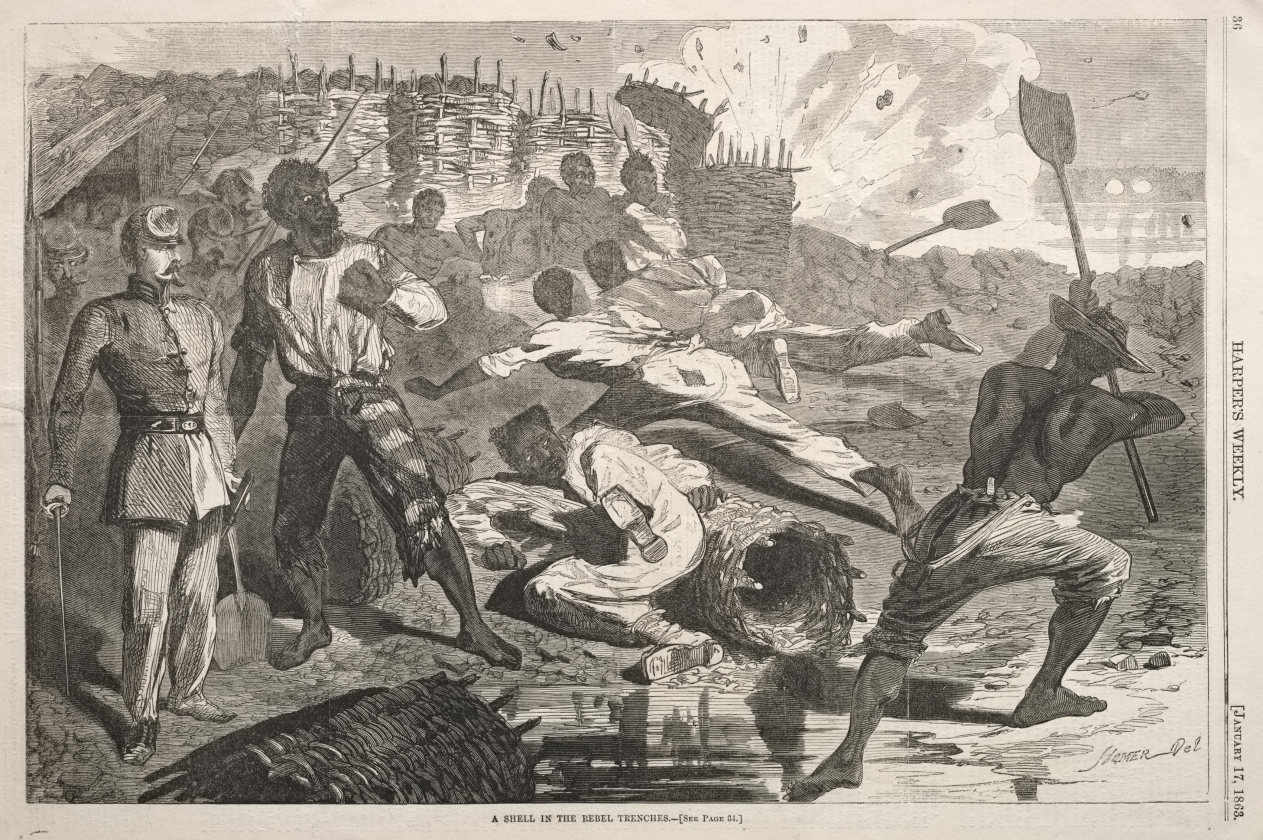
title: A Shell in the Rebel Trenches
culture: America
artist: Winslow Homer (American, 1836–1910)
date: 1863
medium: wood engraving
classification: Print